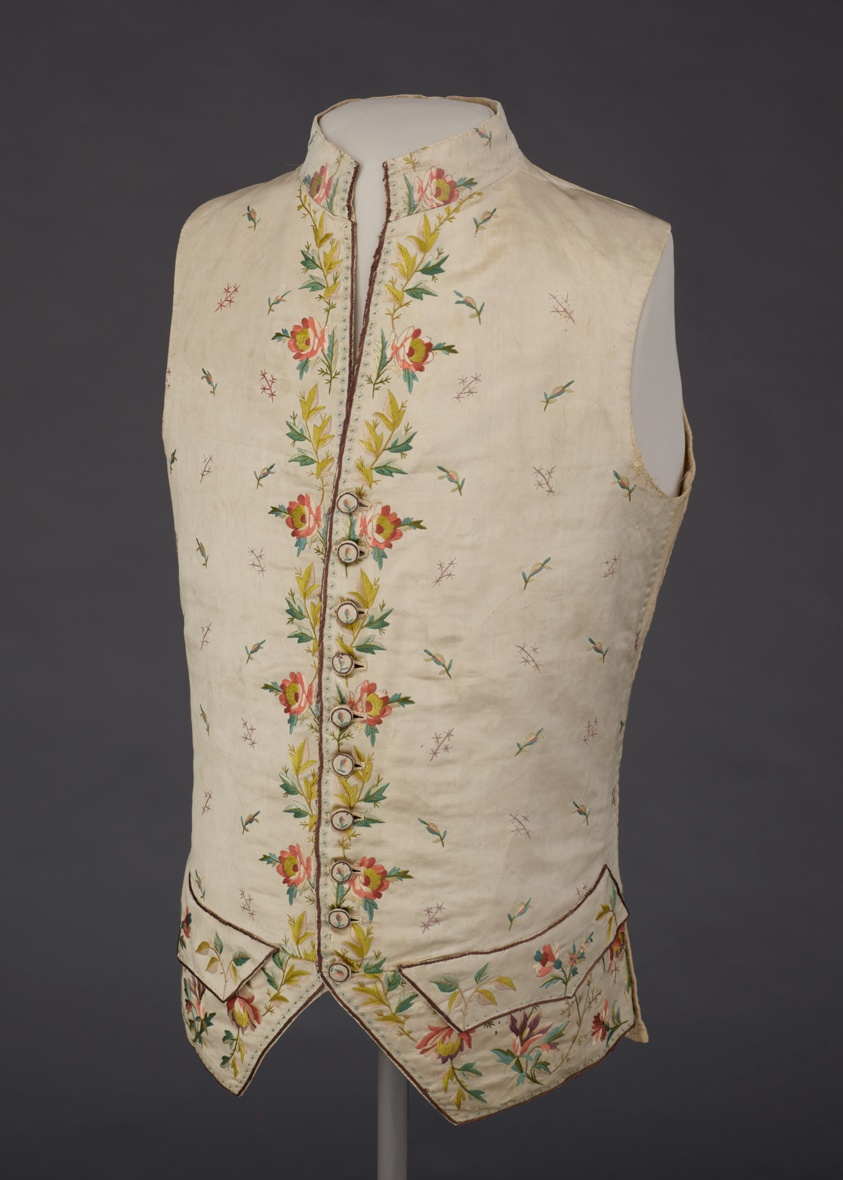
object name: Costume and Accessories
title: Man's Waistcoat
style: 18th Century, Rococo, Neoclassicism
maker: Possibly Lyon, France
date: Embroidered 1780s; altered 1795–1805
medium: Front: Silk, satin-weave foundation, embroidered with silk thread in satin, steam and buttonhole stitches and French knots; embroidered fabric covered buttons; silk, twill weave lining; back: linen, plain weave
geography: France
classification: waistcoat (garment); costume; needlework (visual works); dress (garment); clothing; textile; costume - embroidery; garment; costume - needlework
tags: flowers, roses, fashion, floral, floral motifs